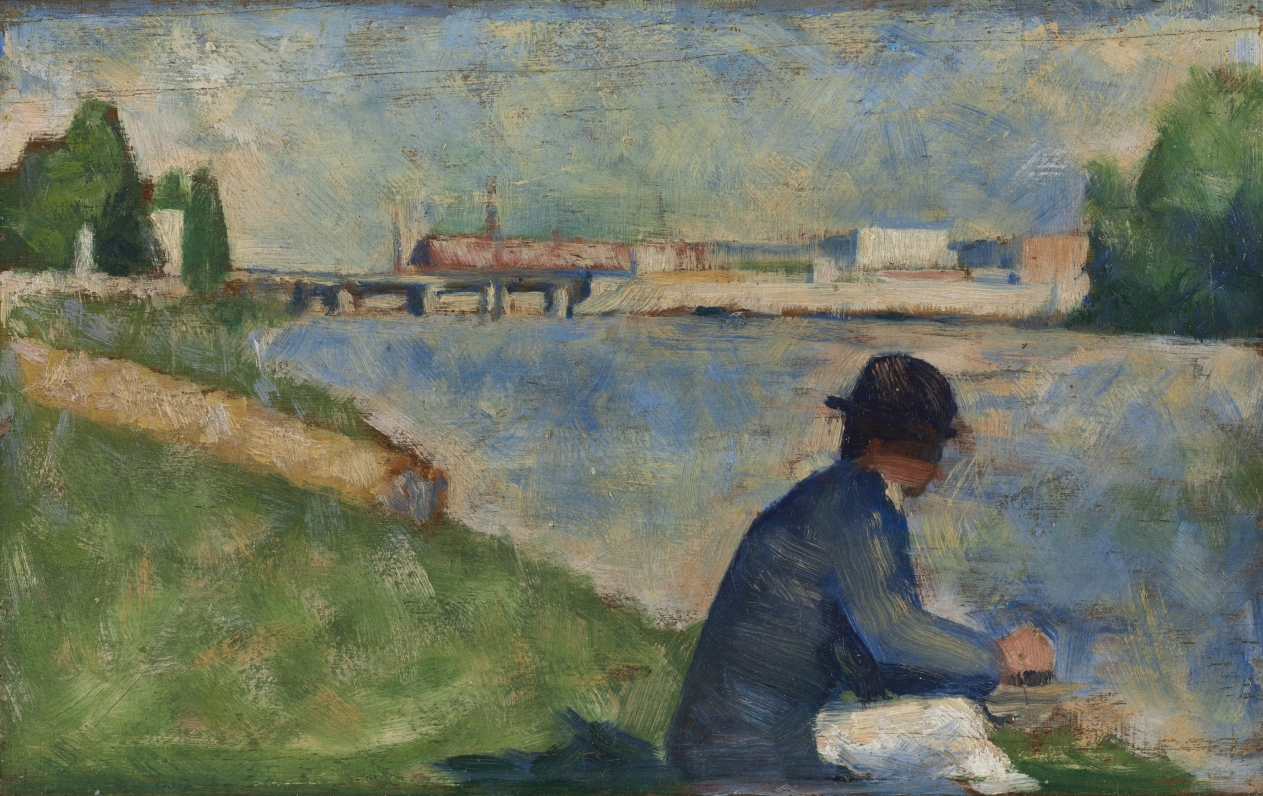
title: Study for "Bathers at Asnières"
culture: France, 19th century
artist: Georges Seurat (French, 1859–1891)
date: c. 1883–84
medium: oil on wood panel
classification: Painting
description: This oil sketch is one of many preparatory studies Seurat made for his monumental painting Bathers at Asnières (1883-84), depicting men leisurely bathing in the Seine near an industrial suburb of Paris. Seurat borrowed the brilliant colors of Impressionism to suggest outdoor light, but added structure by emphasizing basic geometric shapes and firm outlines. As a leader of the movement to reform Impressionism, his style became known as Neo-Impressionism.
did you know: Seurat’s approach to painting differed greatly from the Impressionist painters who worked outdoors in plein-air. In contrast, he worked in the studio preparing his compositions from drawings and preparatory studies.